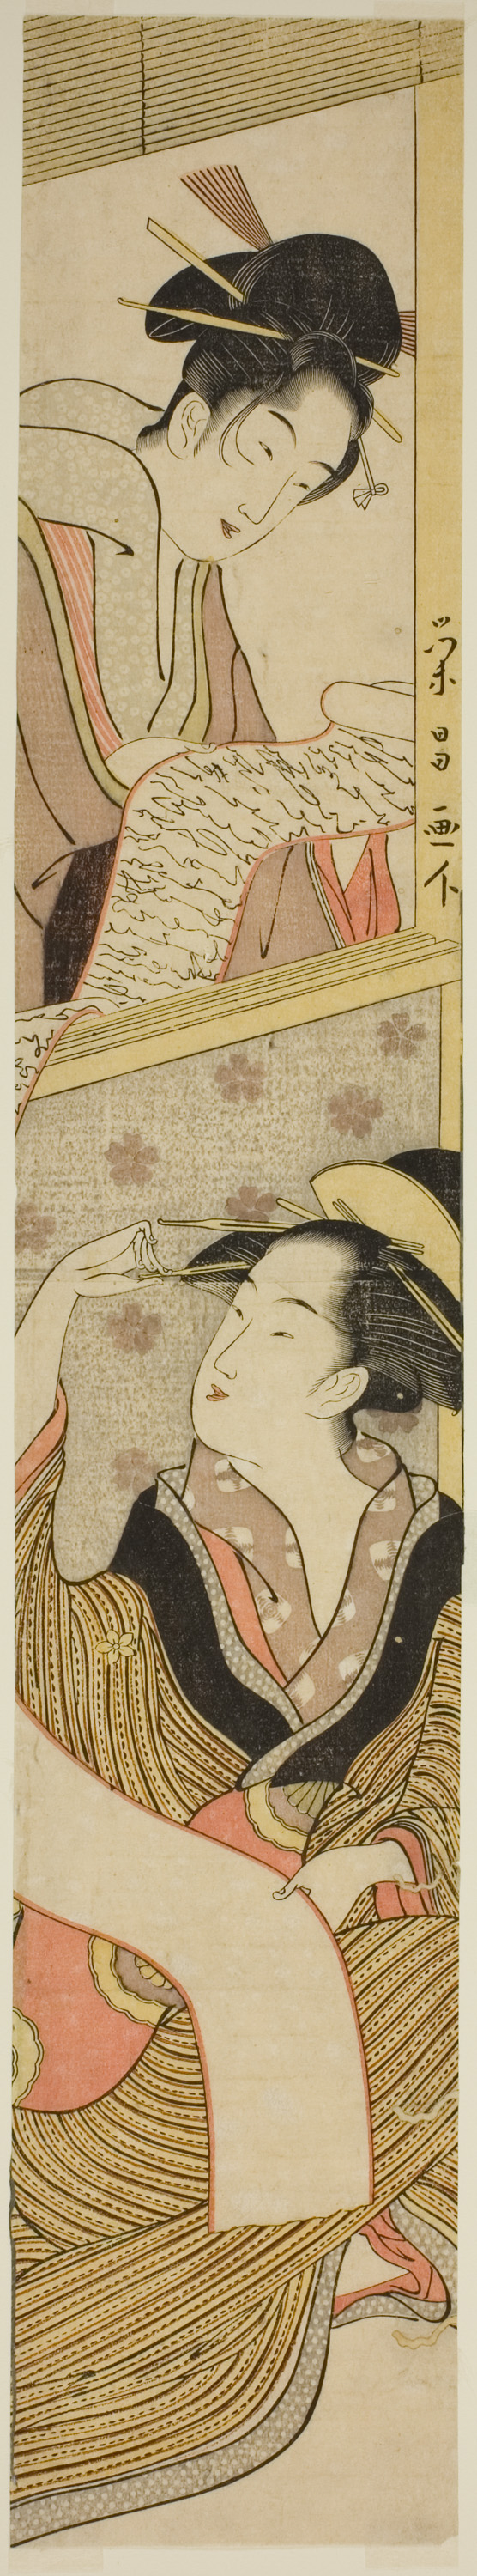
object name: Print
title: Two Beauties Reading a Letter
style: Japanese (culture or style)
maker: Chokosai Eisho (Japanese, active 1780-1800)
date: c. 1780/1800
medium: Color woodblock print; hashira-e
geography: Japan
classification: woodblock print; print; asian art